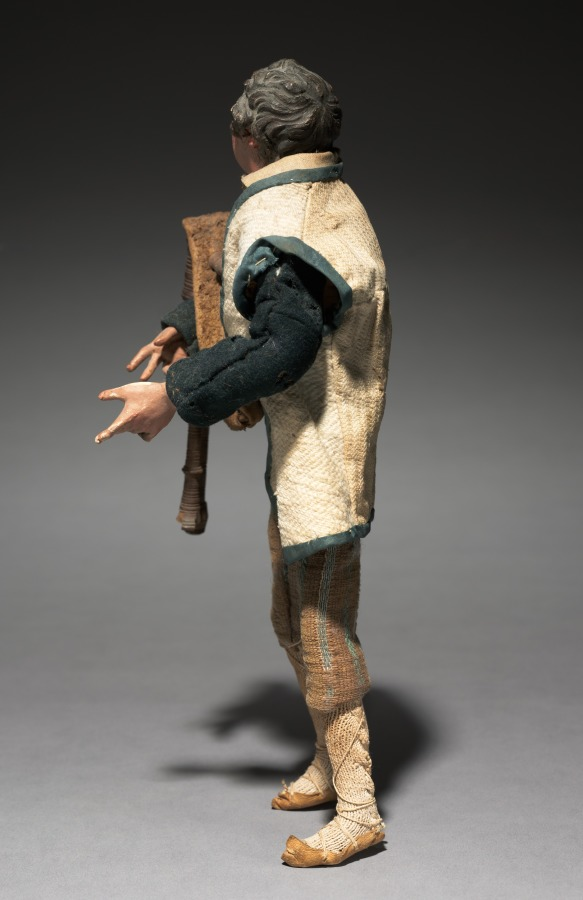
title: Figure from a Crèche: Piper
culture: Italy, Naples, late 18th-early 19th century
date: 1780–1830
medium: painted wood and terracotta with various textiles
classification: Sculpture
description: The practice of creating scenes of the Nativity for the home dates from the early 1700s in Italy, where people began to set up doll-like figures of about a foot or less in height. The custom was particularly popular in Naples around 1800, where crèche scenes (crèche means cradle, or crib) included many figures, whose heads and hands of painted terracotta, stuffed cloth bodies, and clothing adapted from contemporary local costumes gave them an amazingly realistic character. Representations of the birth of Jesus can be traced to the first few centuries of Christianity. Both living creatures and sculptural depictions of them were used from early times. By the late middle ages it was customary to create life-size figures of wood or stone, naturalistically painted, to represent the characters who participated in the events of Jesus's early life. These sculptures were then arranged in scenes illustrating one or both of the most important of these events, the Adoration of the Shepherds and the Adoration of the Magi-the three kings from the East who came to pay homage to the Christ child. Used in churches, these large figures were especially popular in Italy, Central Europe, Spain, and Portugal.